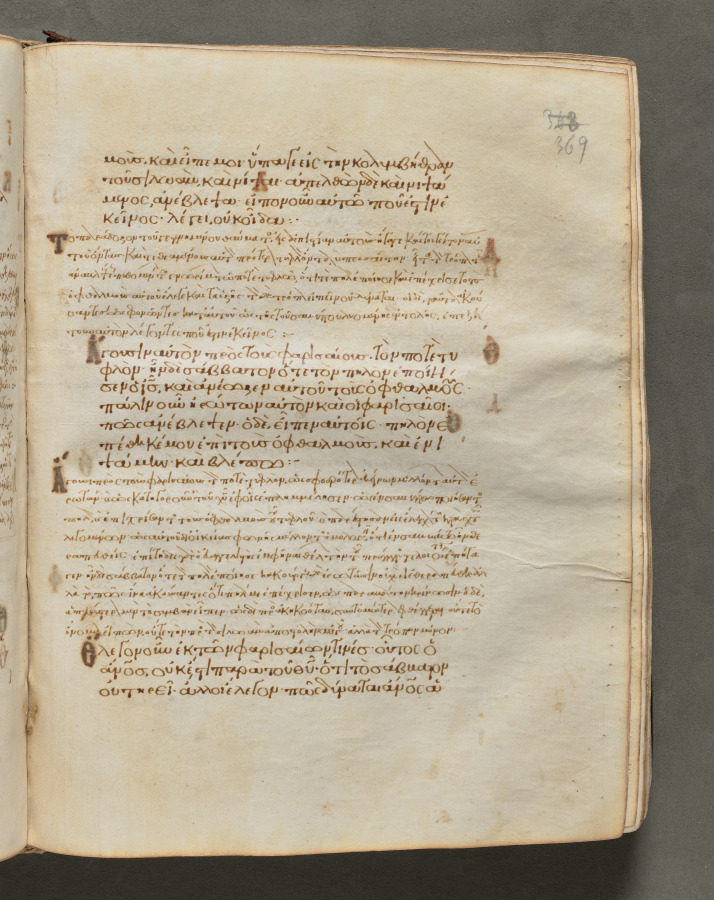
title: Text, folio 369 (recto), from a Gospel Book with Commentaries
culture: Byzantium, Constantinople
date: c. 1000–1100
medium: ink, tempera, and gold on vellum; leather binding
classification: Bound Volume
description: Each of the four gospels in this book opens on a page with brilliantly illuminated borders depicting the author of the text as well as birds—principally peacocks, symbols of the immortality of the soul—and fountains, representing the fountain of life and the salvation of the soul. This volume consists of 428 leaves with texts in Greek. Its level of sophistication suggests that it was probably written and decorated in a monastery in Constantinople.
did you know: Gospel books were carried in procession through Byzantine churches.